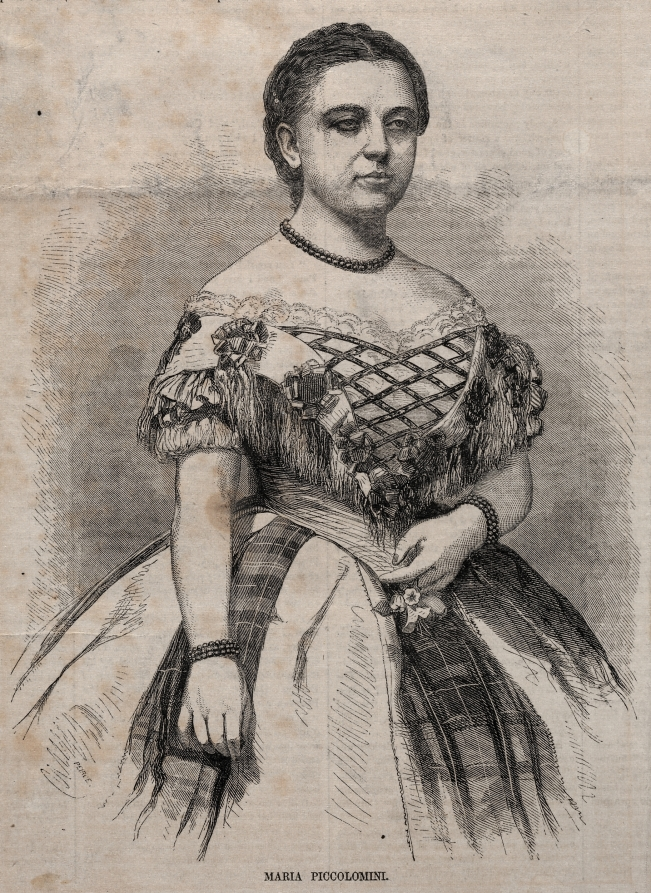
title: Maria Piccolomini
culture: America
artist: Winslow Homer (American, 1836–1910)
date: 1859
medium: wood engraving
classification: Print